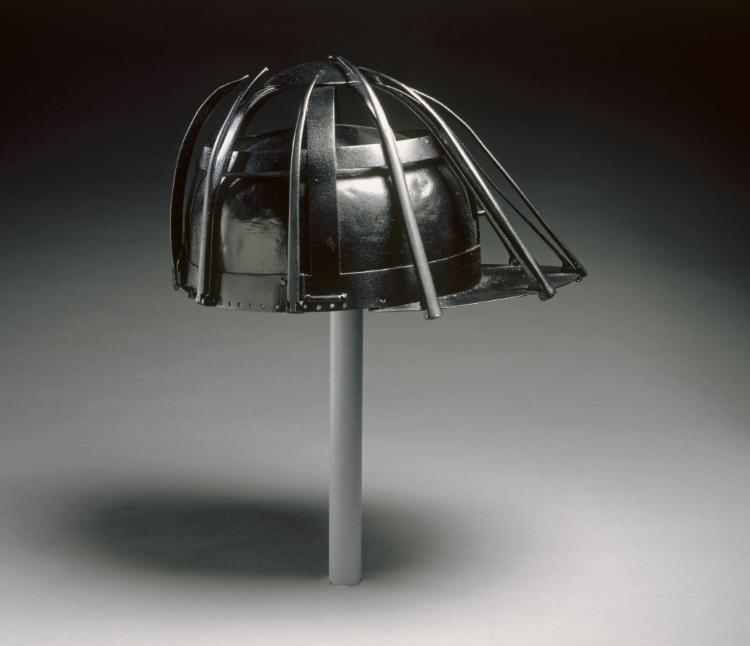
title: Cavalry Spider Helmet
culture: France, 17th century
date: 1600s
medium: iron with black paint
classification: Arms and Armor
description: The "spider-like" legs of this helmet protected the mounted soldier's face and head from slashing sword blows. The legs could be raised and locked up out of the way when not required.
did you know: This helmet was made specifically for use in the field by the light cavalry who wore only a half suit of armor, sturdy riding boots, and an open helmet.